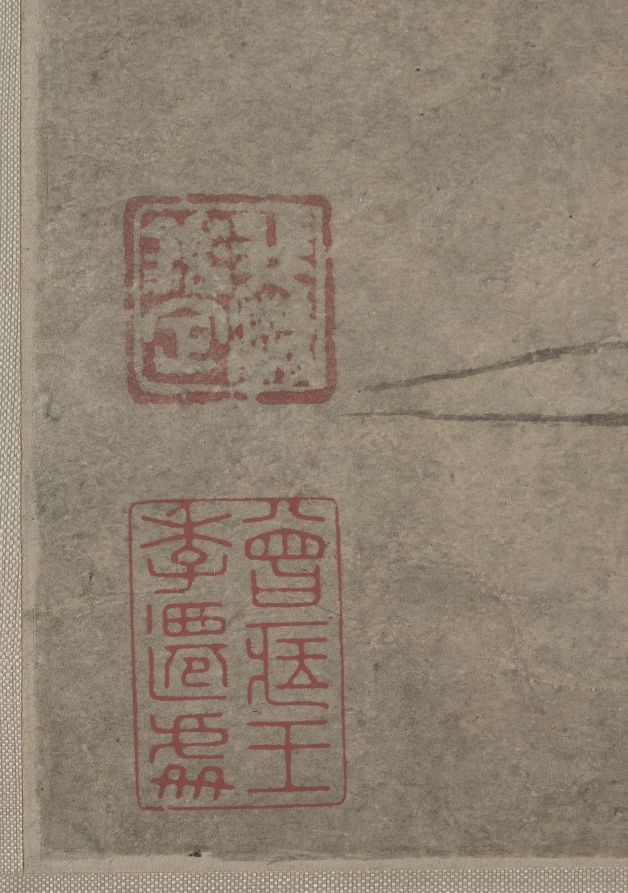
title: The Poet Lin Bu Wandering in the Moonlight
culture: China, Ming dynasty (1368–1644)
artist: Du Jin (Chinese, 1446-c. 1519)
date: late 1400s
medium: Hanging scroll; ink and color on paper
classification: Painting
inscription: 陪月閒行杖屨遲，半醒時節更相宜。 吟成疏影寒香句，為問梅花知不知。 檉居杜堇 [印]一書生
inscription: 1 seal of Zhang Heng 張珩 (1915–1963)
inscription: 1 seal of C. C. Wang [Wang Jiqian] 王季遷 (1907–2003)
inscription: 1 unidentified seal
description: Lin Bu (967–1028), a Northern Song (960–1127) poet and hermit who lived at the West Lake in Hangzhou, was known for having plum trees for his female companions and cranes for his children. This hanging scroll depicts the poet walking in the moonlight and looking at the plum tree, a scene described in his most well-known poem on plum blossoms. Surviving works signed by Du Jin are rare and this painting is one of them. Here, the artist used lively brushwork to depict the plum tree and rocks, exemplified in varying dots and strokes, and sweeps in different shades of ink.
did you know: Lin Bu withdrew from prestigious government service and lived as a hermit by the West Lake in Hangzhou.